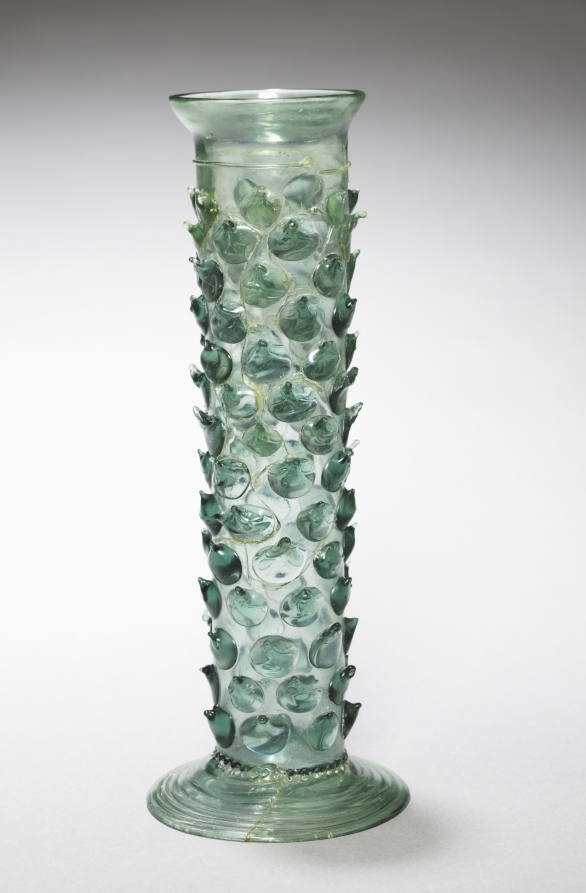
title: Tall Beaker with Prunts (Stangenglas)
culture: Germany, late 15th century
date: late 1400s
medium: green glass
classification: Glass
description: Tall beakers were used for a variety of beverages, but especially wine and beer. They were often passed around during communal drinking on celebratory occasions. This pole glass (stangenglas), characterized by its tall cylindrical structure and pedestal foot, is adorned with prunts, glass blobs that afford a firm grip in the absence of a handle.